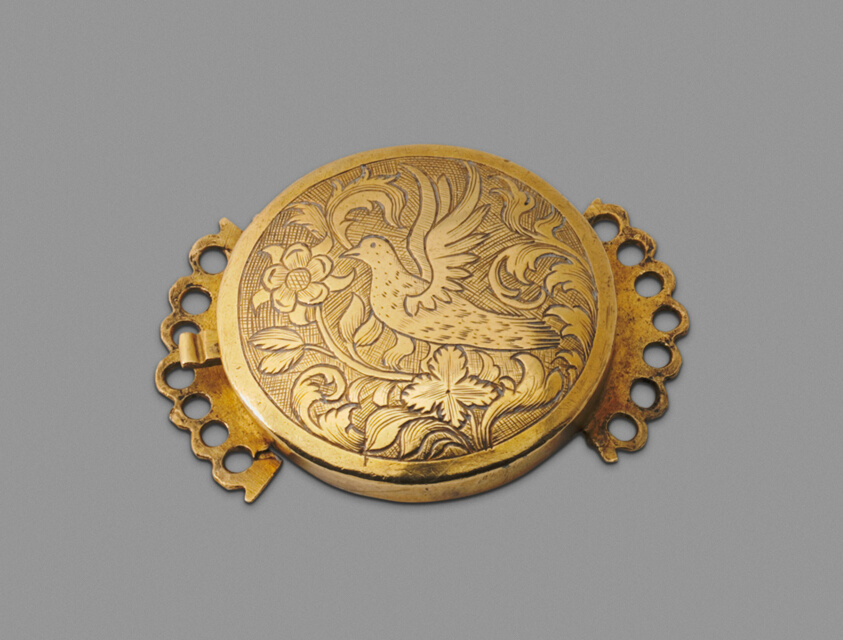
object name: Decorative Arts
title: Clasp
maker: Attributed to Henricus Boelen; American, 1697–1755; New York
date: 1720–50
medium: Gold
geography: New York City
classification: clasp (fastener); jewelry; american decorative arts; american arts; decorative arts